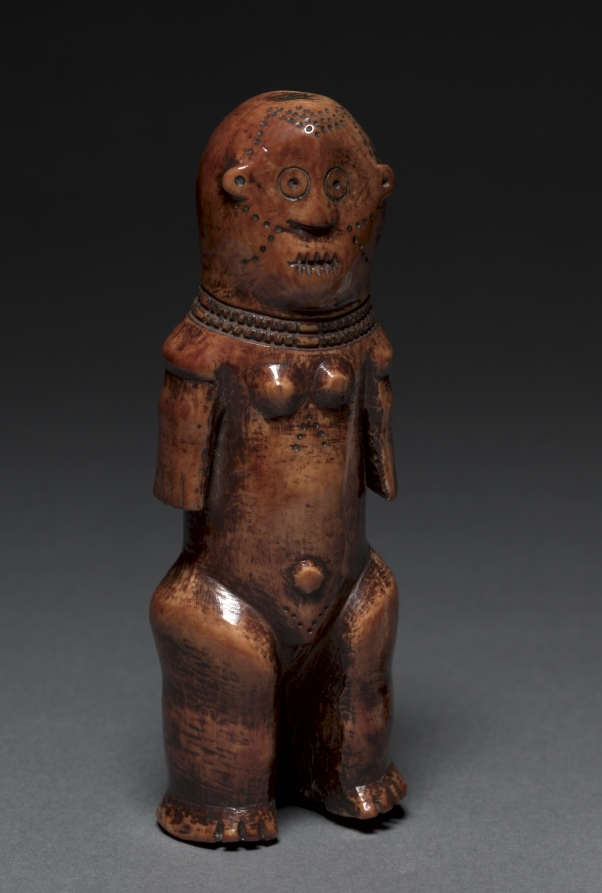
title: Figure (iginga)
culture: Africa, Central Africa, Democratic Republic of Congo, Lega-style maker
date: probably 1800s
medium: Elephant ivory, tukula, and oil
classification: Sculpture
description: The life of Lega men and women is structured around their advancement through the different grades of the Bwami association. Fulfilling political, social, religious, and other roles, the members’ ultimate purpose is the pursuit of wisdom and excellence. Ivory figurines were reserved for members of the two highest Bwami grades, in which the core of the Lega’s moral philosophy is revealed.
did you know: The dark surface (patina) of this sculpture comes from years of handling and the application of oil and a red powder called tukula; it was originally cream-colored!